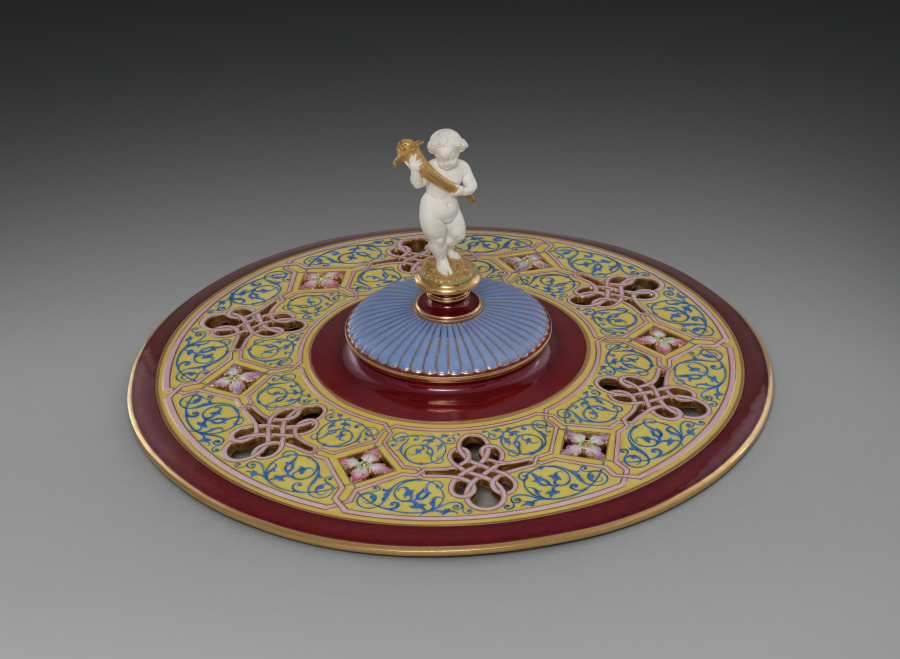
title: Cover for a Standing Cup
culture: France, Sèvres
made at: Sèvres Porcelain Factory (French, est. 1756)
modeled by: Hyacinthe-Jean Regnier (French, 1803–1870)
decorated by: Francois-Hubert Barbin (French, 1786-)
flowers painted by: Jacques-Nicolas Sinsson (French)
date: 1844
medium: porcelain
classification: Ceramic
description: The official French porcelain factory at Sèvres has always been one of Europe's most important ceramic manufacturers, famous for its decorative pieces as well as more utilitarian wares. This vase in the Renaissance style, its design inspired by 16th-century French examples, is clearly in the tradition of elaborately conceived and decorated pieces intended for use by the French court or as presentation pieces by its monarchs. The latter was the fate of this Covered Cup, acquired in 1846 by Queen Marie-Amélie d'Orleans, the wife of Louis-Philippe, king during the July Monarchy (1830-48). Soon thereafter the vase was presented to a now unknown person. It is one of four pieces of this design made at the Sèvres factory, and the only one known today to have survived.